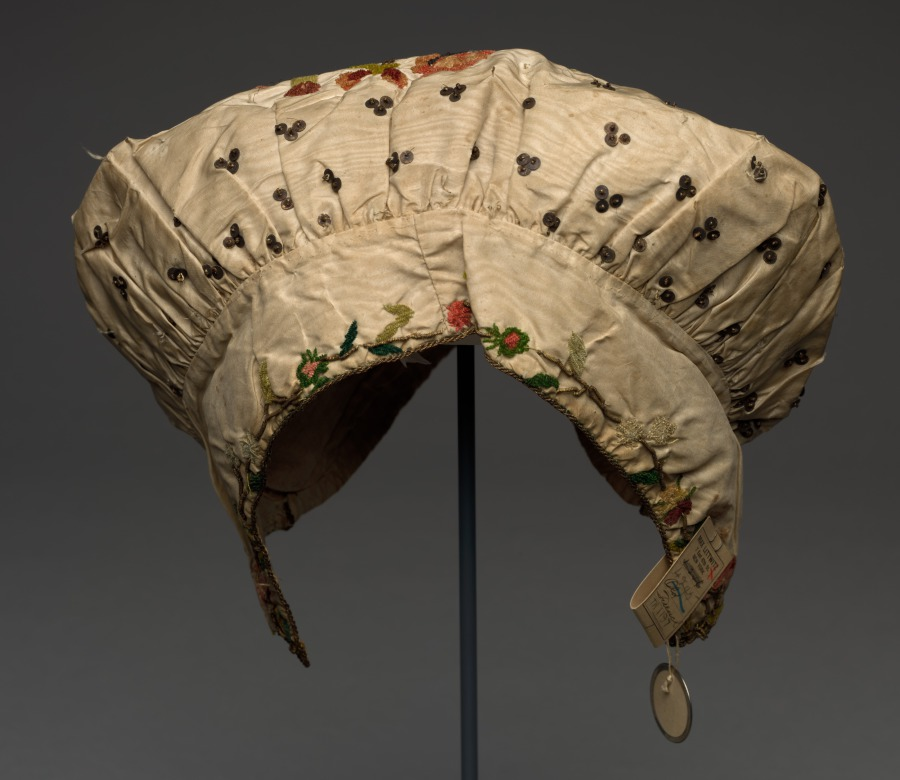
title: Headdress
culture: France, 18th century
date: 1700s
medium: silk, metallic thread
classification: Garment